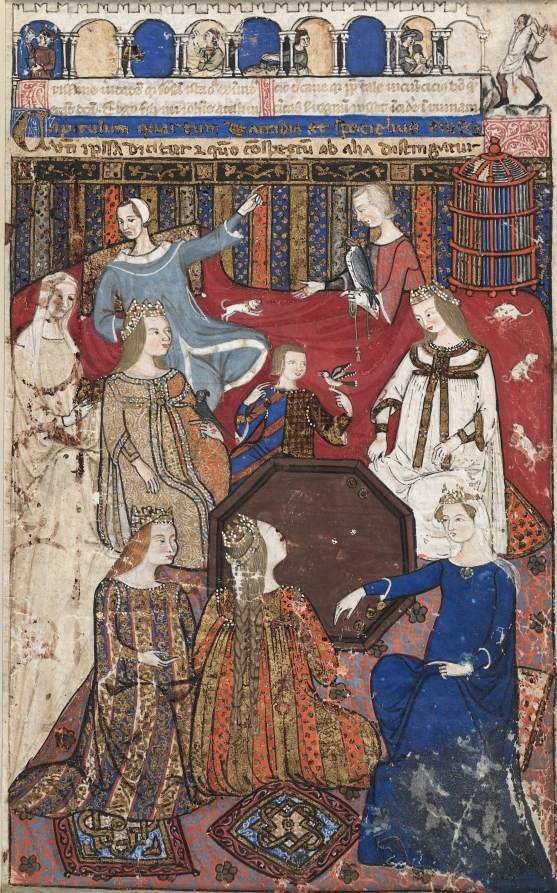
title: Leaf from a Cocharelli Treatise on the Vices: Acedia and Her Court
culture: Italy, Genoa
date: c. 1330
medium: ink, tempera, and gold on vellum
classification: Manuscript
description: This leaf comes from a treatise written before 1324 by a member of the Genoese Cocharelli family as a moral lesson for the following generation. The family’s dedication to education is seen in the use of Latin and the theme of the seven capital vices. We see Queen Accidia (or Sloth) lying in bed, bored despite all the distractions around her. The depiction of the precious fabrics shows an intimate knowledge of textiles from the Islamic world and is a testament to the flourishing trade contacts of Genoa.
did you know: This miniature is noteworthy for its depiction of richly adorned textiles and jeweled headdresses imitative of the Islamic world.